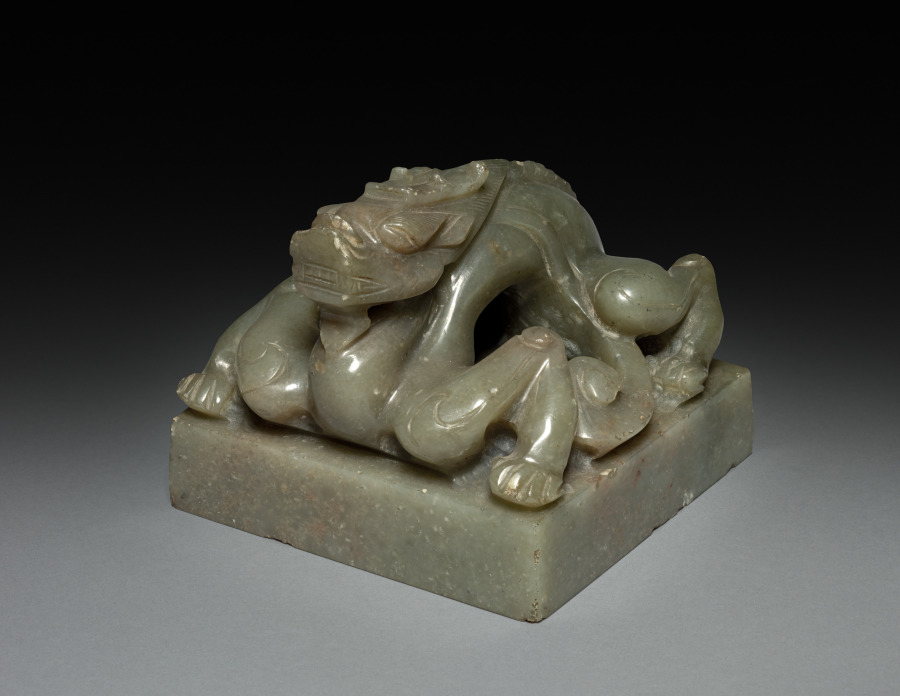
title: Seal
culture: China, Qing dynasty (1644-1911)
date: 1700 or later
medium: Jade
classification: Jade